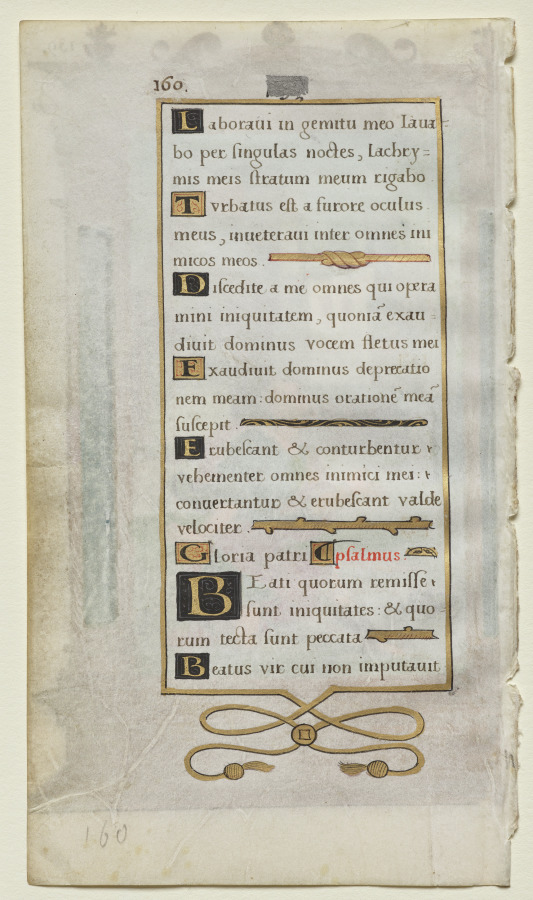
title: Leaf from a Book of Hours: King David in Prayer (2 of 3 Excised Leaves)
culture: France, 16th century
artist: Noël Bellemare (French, d. 1546)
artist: The 1520s Hours Workshop (French)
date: c. 1530–35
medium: ink, tempera and liquid gold on vellum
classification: Manuscript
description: The 1520s Hours Workshop produced luxury books of hours for a wealthy, often royal, clientele. Recent evidence points to Paris as the site of the workshop’s activity under the direction of Antwerp-born miniaturist Noël Bellemare (died 1546). Containing fuschia pinks and bright acid greens, the palette is unusual in French manuscript painting of the period. Instead, Bellemare’s miniatures point directly to Antwerp painting at the time.